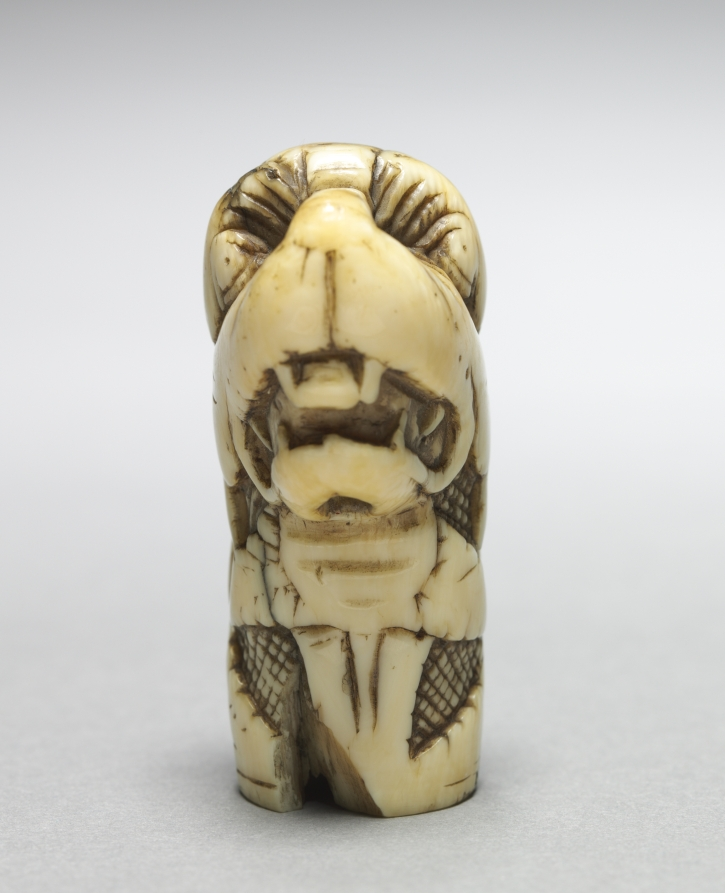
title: Dragon's Head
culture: Anglo-Norman?, Romanesque period, 12th century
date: 1100–1150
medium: walrus ivory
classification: Ivory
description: This exceedingly rare medieval carving, which recalls the more monumental carvings on Viking ship prows, may have been a finial for a diagonal member of a folding chair. The character of the head, the stylized acanthus leaves, and the foliage-spouting mask on the neck are characteristic of north European and Anglo-Norman Romanesque styles.